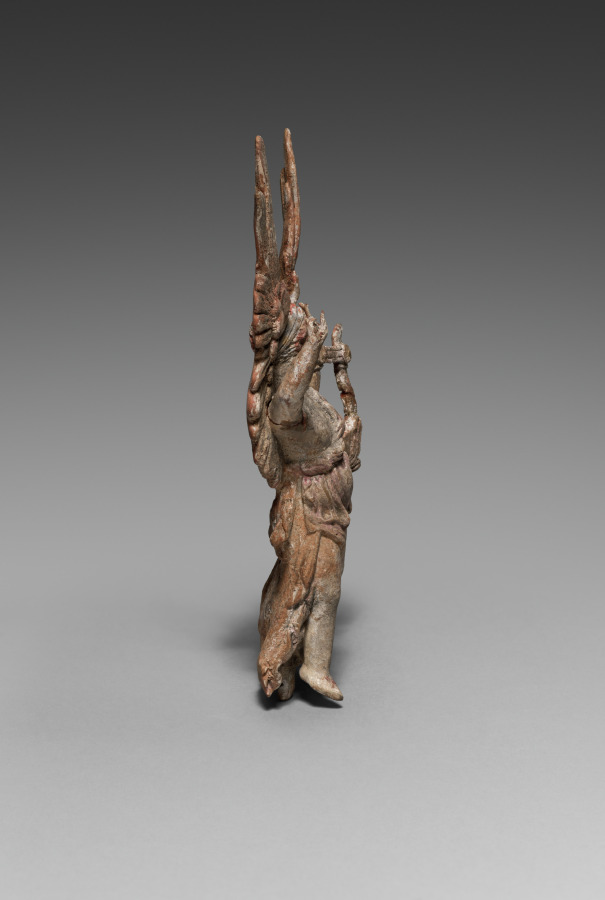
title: Figurine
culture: Greece, Myrina, Hellenistic period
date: 300–100 BCE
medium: terracotta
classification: Sculpture